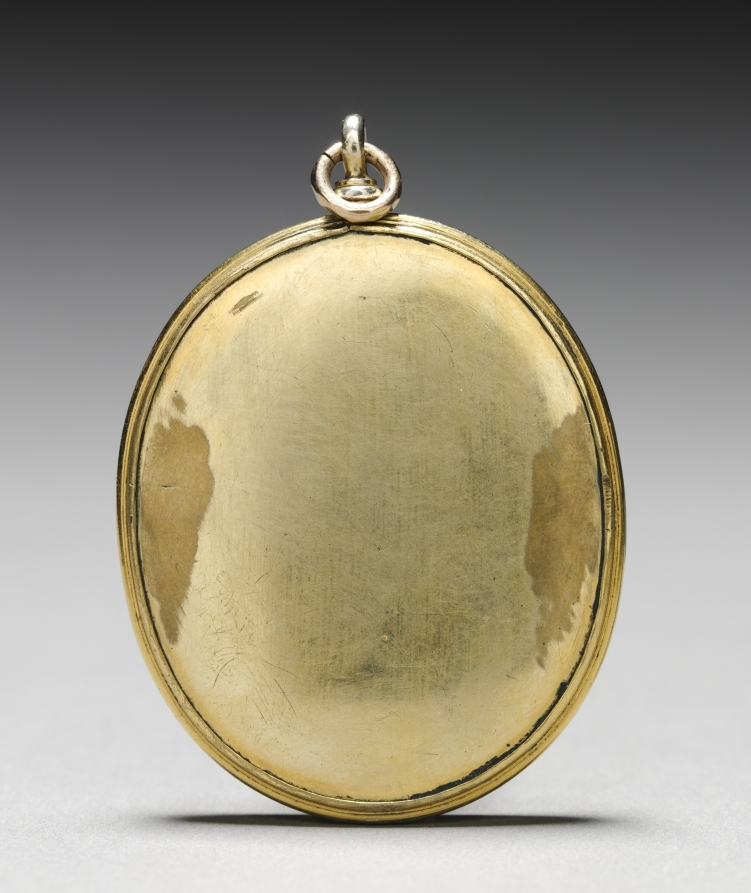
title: Mars, Minerva, Venus, and Cupid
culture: Italy, 16th century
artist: Valerio Belli (Italian, c. 1468–1546)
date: early 1500s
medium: rock crystal intaglio, gilded from reverse with gold and silver, backed with lapis lazuli, mounted in a gold pendant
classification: Sculpture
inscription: VALERIUS·VI·F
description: Mars, the god of war, chooses Minerva over Venus, goddesses representing Virtue and Vice. The subject was common in antiquity, although the male figure traditionally represents Hercules. The snake passing from Minerva to Mars lionizes wisdom, perhaps indicating that the patron, who has yet to be identified, connected the idea of a difficult choice to a specific military or political problem.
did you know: Lapis lazuli, the stone used in this pendant, was first mined in Afghanistan 9000 years ago.